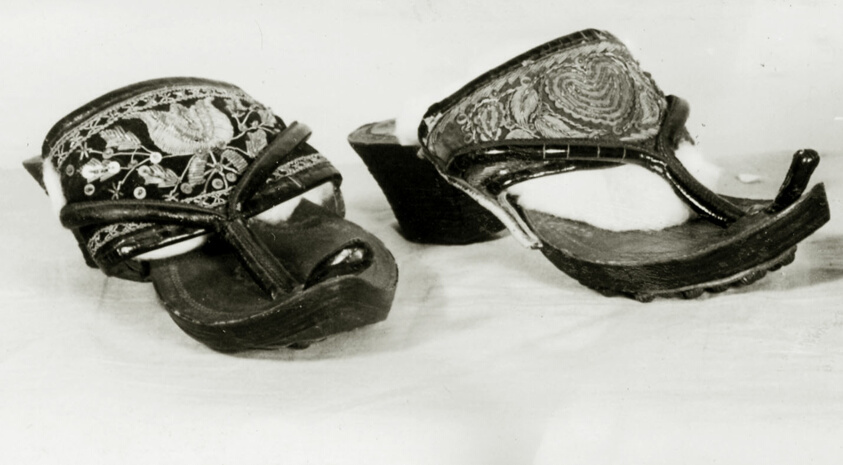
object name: Costume and Accessories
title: Pair of Sandals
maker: Burma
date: 19th century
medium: Leather, silk, cut velvet weave, with needlework and sequins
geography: Myanmar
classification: textile; shoes - needlework; costume accessory - shoe; costume accessory; costume; dress (garment); clothing